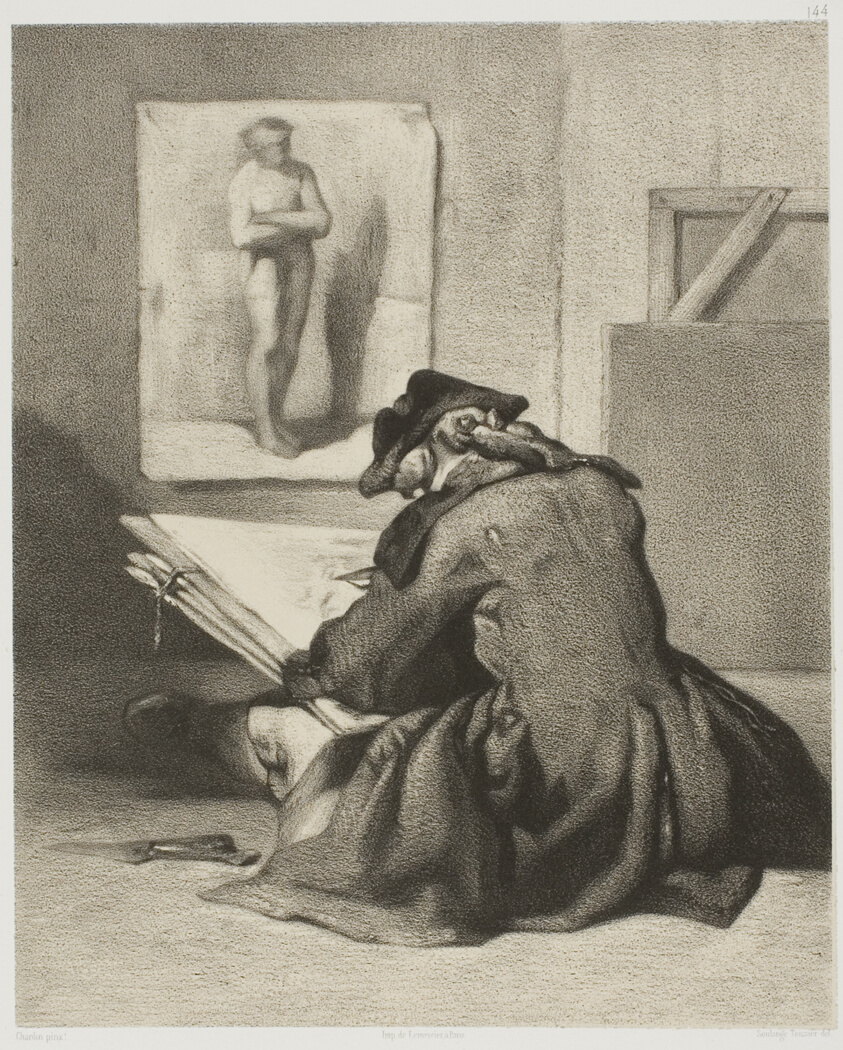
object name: Print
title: Unknown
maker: Louis Emmanuel Soulange-Teissier (French, 1814-1898); after Jean Baptiste Siméon Chardin (French, 1699-1779); printed by Lemercier et Compagnie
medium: Lithograph in black on tan wove chine laid down on white wove paper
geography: France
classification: lithograph; print; prints and drawing